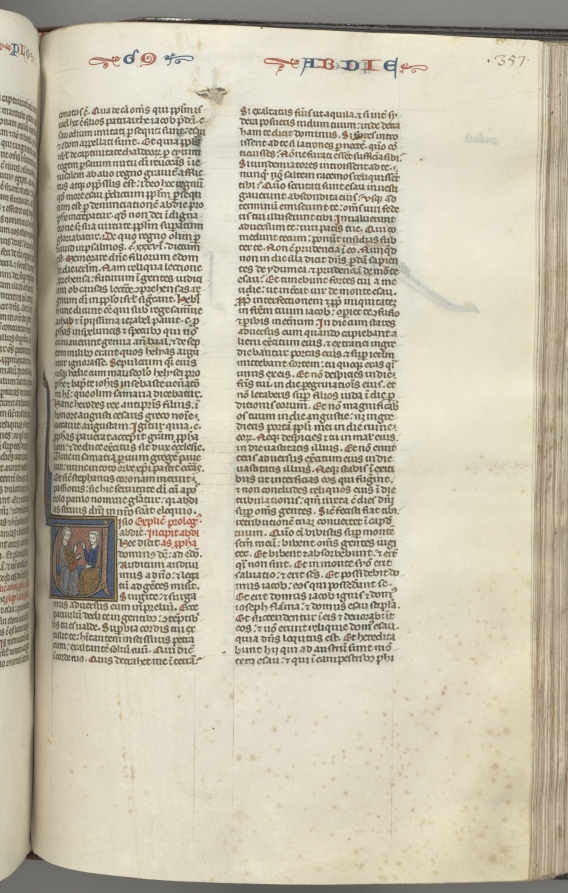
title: Fol. 357r, Obadiah, historiated initial V, Obadiah and a Jew in discussion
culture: Southern France, Toulouse(?), 13th century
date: c. 1275–1300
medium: ink, tempera and gold on vellum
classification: Bound Volume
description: Biblical manuscripts were highly prized and important possessions of churches, monasteries, cathedral schools, and universities throughout medieval Europe. The biblical texts were known as the vulgate, the translations made by Saint Jerome in the fourth century from Hebrew and Greek into Latin, which became the definitive and official Latin version of the Roman Church. In the 13th century, the bible was, for the first time, produced as a single volume with an officially sanctioned sequence to its books and chapters as illustrated by this example. The very extensive decoration of this bible is arranged hierarchically to indicate the relative importance of the various texts so that full or almost full-page initials mark the openings of the first prologue, Genesis, and the first Gospel; historiated initials mark the beginning of each book and illuminated initials mark the Prologues.